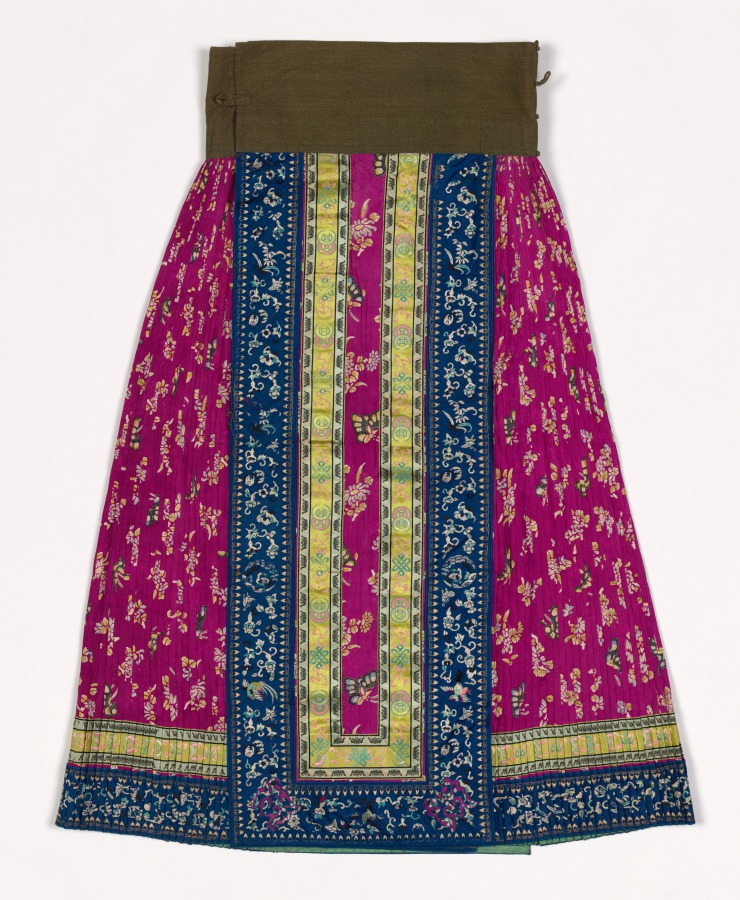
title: Skirt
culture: China, Late 19th century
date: c. 1875–1900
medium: embroidered silk, wool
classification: Garment